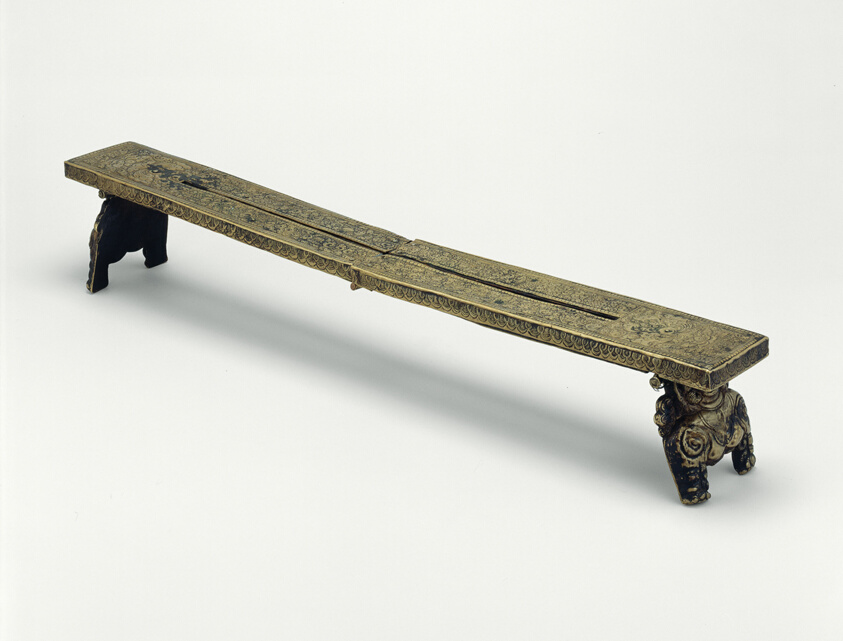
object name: Religious/Ritual Object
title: Ritual Stand with Lion Supports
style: Himalayan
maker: Tibet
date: 15th/16th century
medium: Copper and wood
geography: Tibet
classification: metal; ceremonial object; asian art; ritual objects